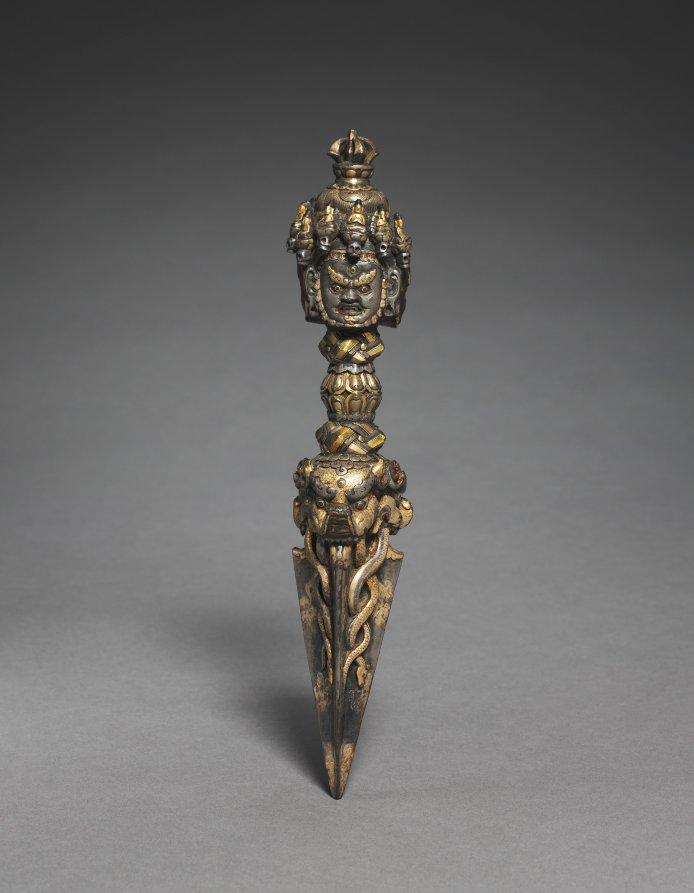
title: Phurbu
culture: Sino-Tibetan, Yongle period (1403–1424)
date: 1403–24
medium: metal alloys with gold and silver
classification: Metalwork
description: A purba is a dagger-like stake with three blades that helps tantric practitioners overcome their aversions to substances that are typically considered abhorrent, like pus and blood. Pierced with the purba, the unsavory substances are ritually transformed into wondrous substances, such as nectar. Crowning this purba are a half-vajra and three heads of the tantric enlightened being named Vajrakila, who presides over powers of transformation from wickedness to compassion. Each of his faces has been wrought of a different metal alloy in the imperial workshop of the Chinese emperor of the Ming dynasty. The luxurious quality of the endless knot motifs, the crocodile heads, and the snakes twisting down the center of each blade indicate Chinese imperial workmanship.